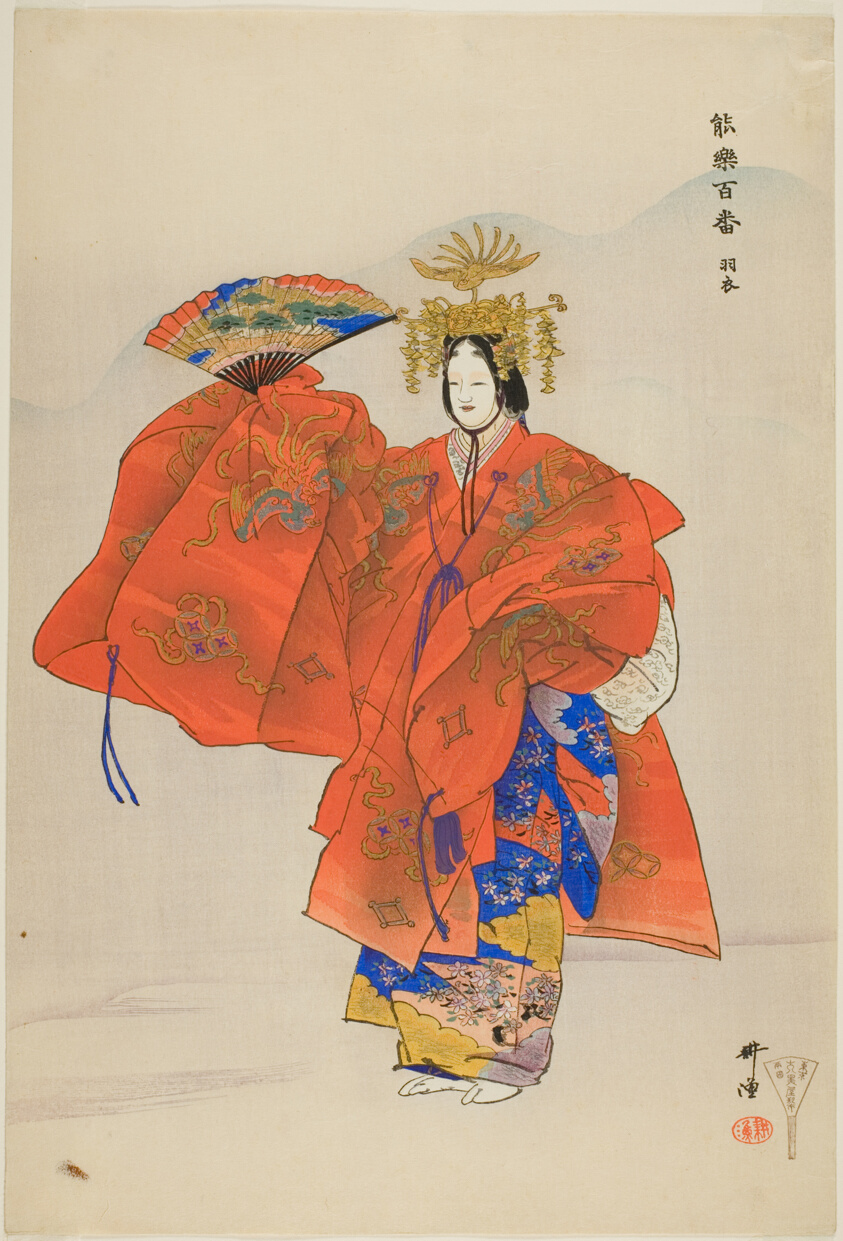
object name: Print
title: Hagoromo, from the series "One Hundred No Dramas (Nogaku hyakuban)"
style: Japanese (culture or style)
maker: Tsukioka Kogyo; Japanese, 1869-1927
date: 1898/1903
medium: Color woodblock print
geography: Japan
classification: woodblock print; print; asian art